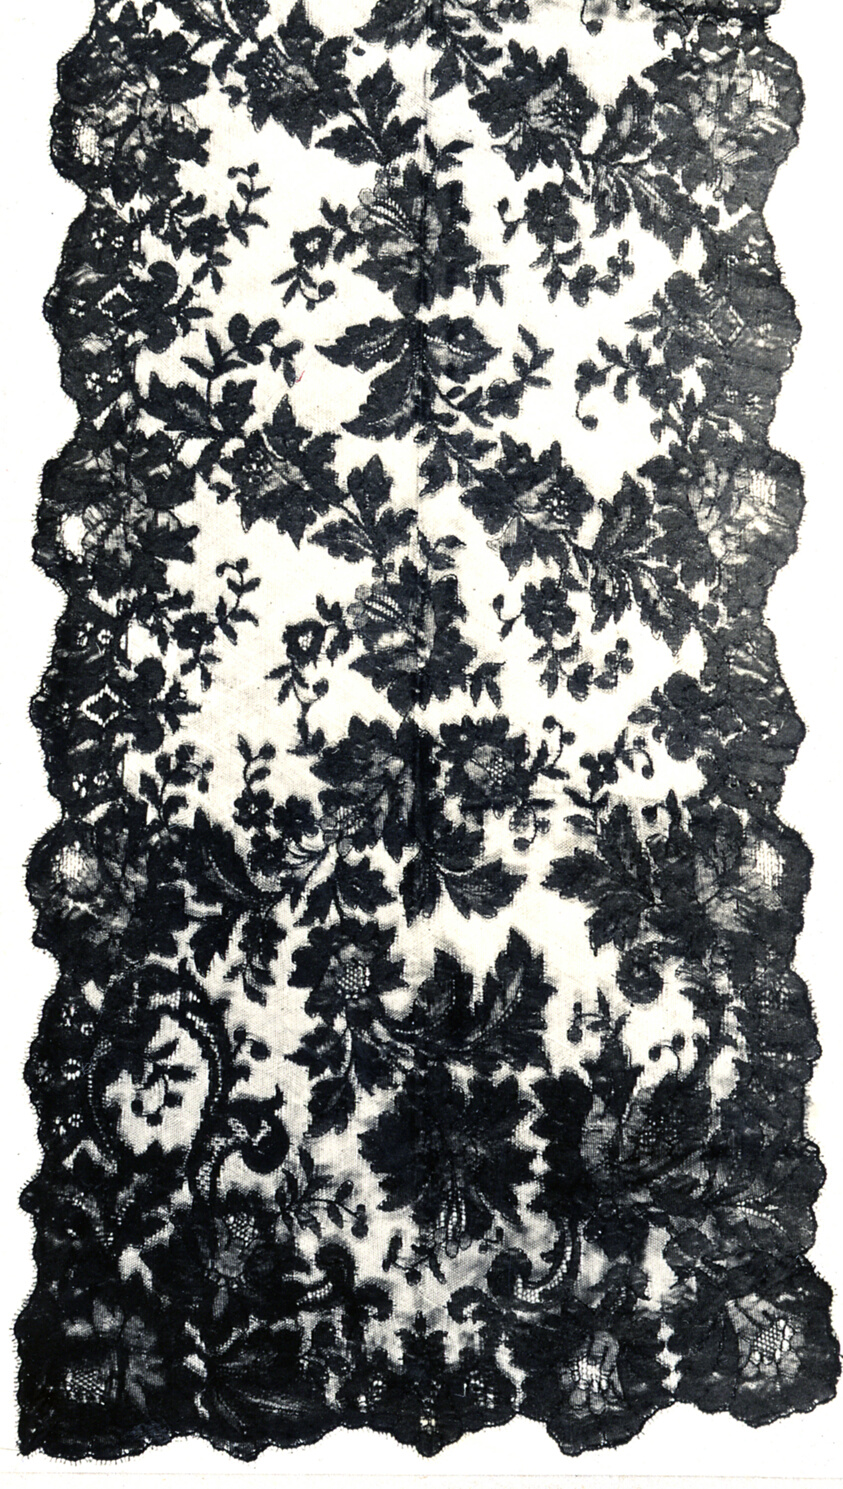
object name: Textile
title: Stole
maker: England or France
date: 1870s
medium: Silk, Pusher machine lace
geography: England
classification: textile; lace - machine; costume; dress (garment); clothing